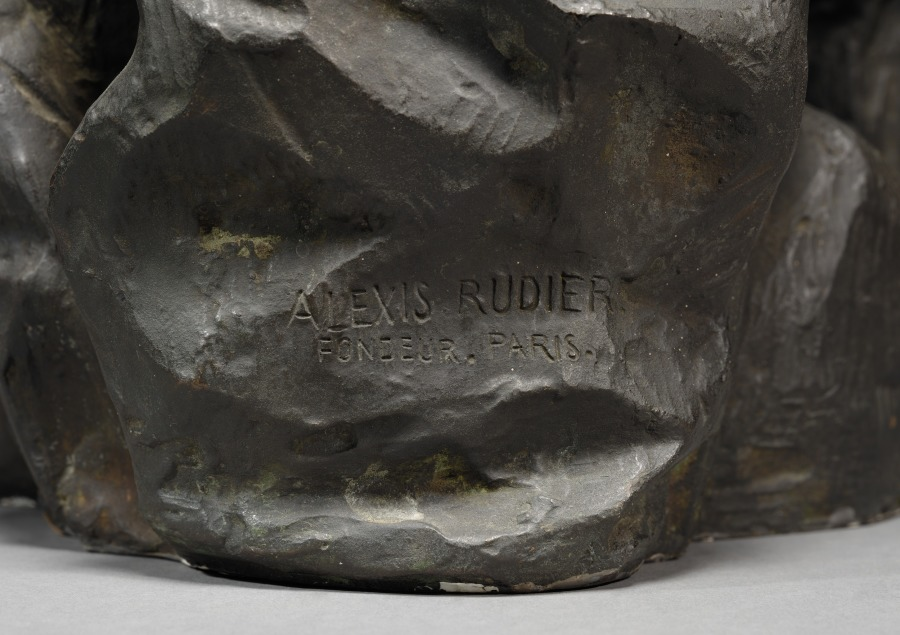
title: Rodin Working on "The Gates of Hell"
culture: France, 20th century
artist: Emile Antoine Bourdelle (French, 1861–1929)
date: 1910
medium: bronze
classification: Sculpture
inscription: Inscribed on side: "Rodin travaillant a la porte de l'enfer"; "Emile-Antoine Bourdelle, 1910"